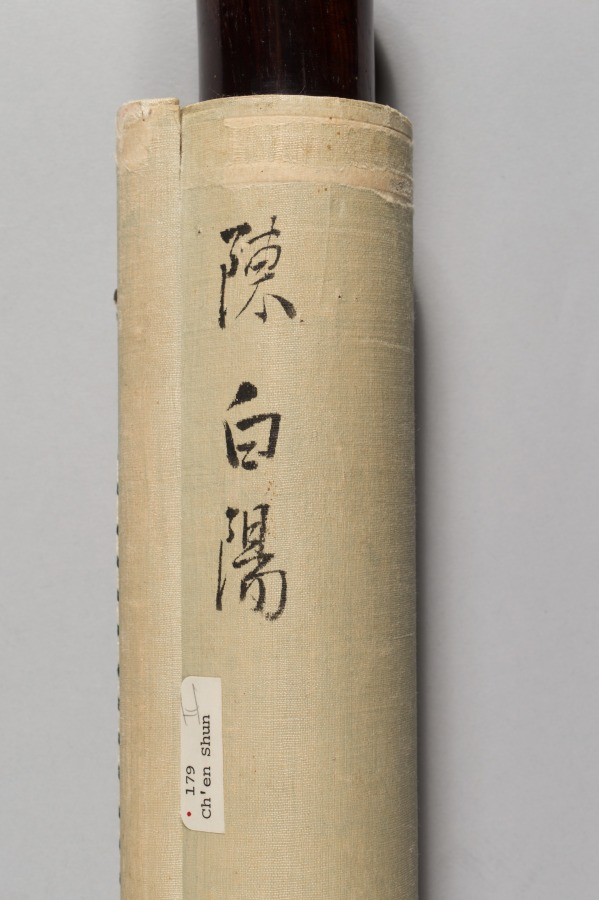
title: Looking for a Monastery in the Misty Mountains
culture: China, Ming dynasty (1368–1644)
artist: Chen Chun (Chinese, 1483–1544)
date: 1500–1544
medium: hanging scroll, ink on paper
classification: Painting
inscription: Artist's inscription, signature, and 2 seals: Row after row of misty trees envelop the Buddhist Monastery./ But the rustic who comes to find it will not lose his way./ Just across the wooden bridge, the dusty world is cut off;/ Among the countless falling petals, birds are singing confusedly. Daofu 道複 composed [this]. [seals] Fufu shi 復甫; Baiyang shanren 白陽山人. trans. WKH/LYSL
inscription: 3 additional unidentified seals.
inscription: 1 additional unidentified seal on the back of the mounting.